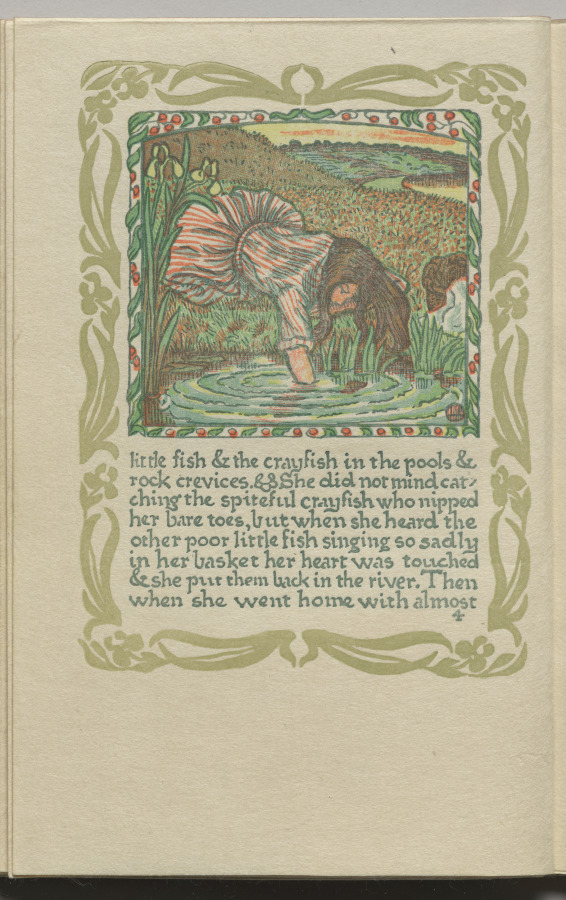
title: The Queen of the Fishes: Plate 4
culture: England, 19th century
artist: Lucien Pissarro (British, 1863–1944)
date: 1894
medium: color woodcut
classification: Bound Volume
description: Pissarro, son of the French Impressionist artist Camille Pissarro, moved to England in 1890. By 1894 he and his wife, Esther Bensusan Pissarro, had bought a printing press and established the Eragny Press. Influenced by William Morris, they were involved in every step of the production process: designing, cutting the woodblocks, setting type, and printing. The first book published by Ergany Press, The Queen of the Fishes, is based on an old fairy tale in which a peasant boy and girl escape the hardships of their lives by fantasizing that they have been turned into a giant oak and a splendid fish, respectively.